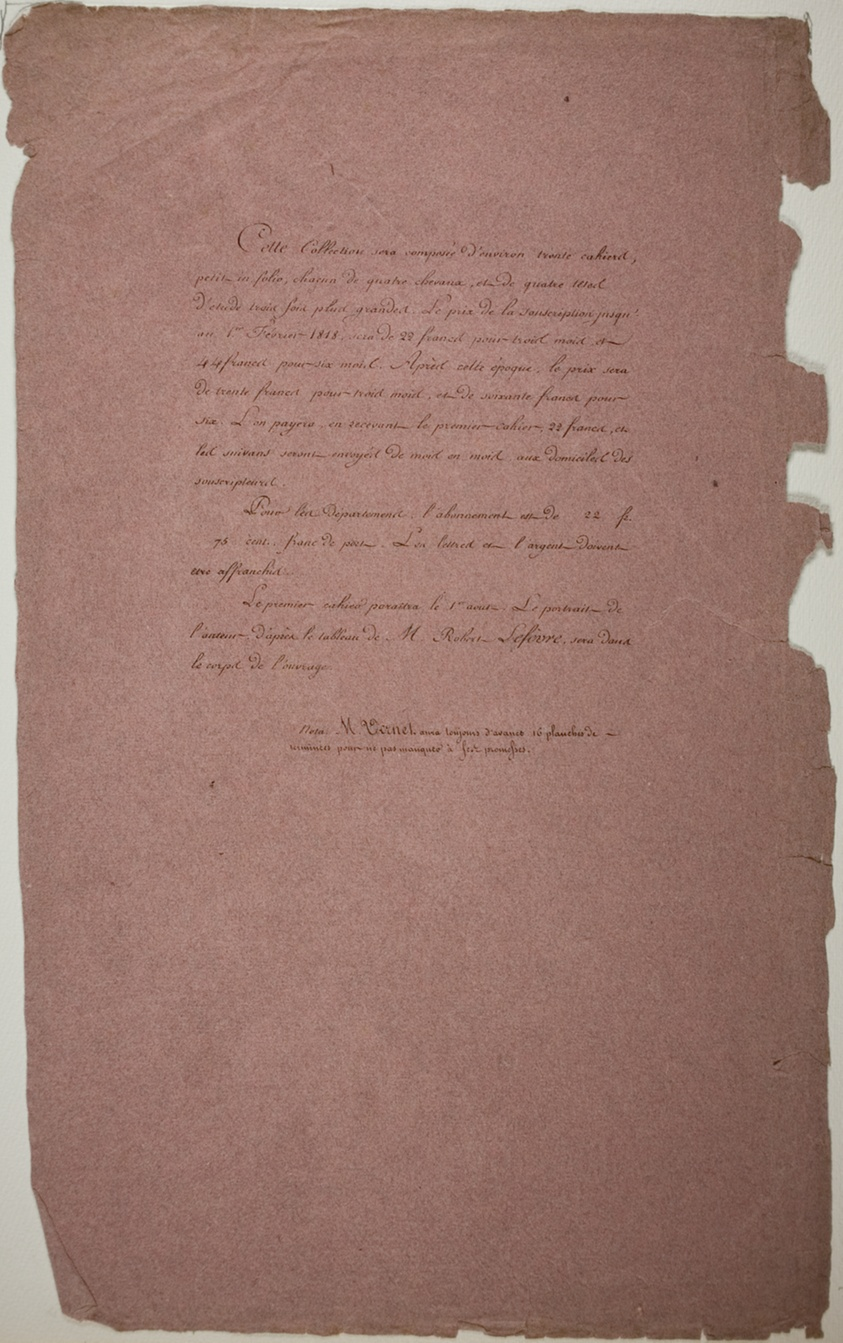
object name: Print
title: Subscription Page, from Horses of Many Countries, second volume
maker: Carle Vernet (French, 1758-1836); printed by Comte de Charles Philibert Lasteyrie du Saillant (French, 1759-1849)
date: c. 1818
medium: Lithograph in black on mauve laid paper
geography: France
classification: lithograph; print; prints and drawing